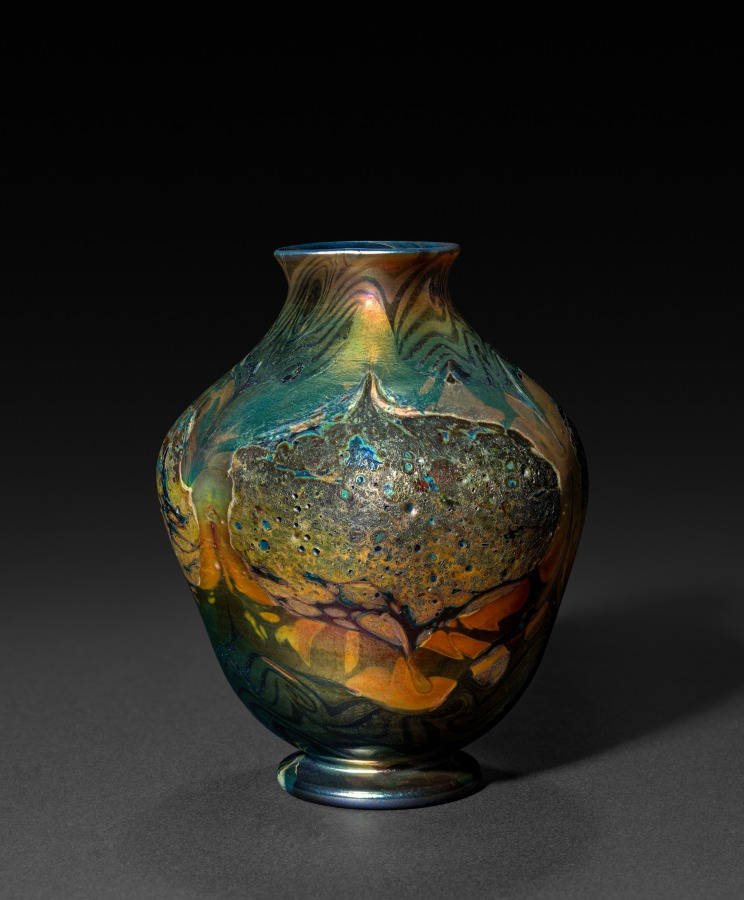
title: Cypriot Vase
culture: America, New York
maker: Tiffany Glass & Decorating Company (America, New York, 1892–1902)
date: c. 1895–1900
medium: Favrile glass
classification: Glass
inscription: engraved on underside: L.C.T. 5339 #206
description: This small vase is an example of Louis Comfort Tiffany's signature Favrile glass. It was made in the style of ancient glass from Cyprus that Tiffany had admired for the iridescent color and encrusted texture of the surface caused by oxidation while buried for many years. Tiffany had noticed these qualities in ancient glass exhibited at the Metropolitan Museum of Art and at his father's store, Tiffany & Co., in New York. When Tiffany began collaborating with artisans on new types of glass production in the 1880s, his aesthetic ambitions were realized in the development of Favrile glass, deliberately named to sound French, expensive, and “handmade.” Largely through Tiffany's marketing ability, Favrile glass became America’s greatest contribution to the Art Nouveau style. His works were exhibited at international expositions; galleries in major European cities, where his creations were bought by many museums; and in his store in Manhattan, known as the Tiffany Glass and Decorating Co., later Tiffany Studios. From the outset, Tiffany used Favrile glass in mosaic panels, stained glass windows, and his artistic line of table and floor lamps.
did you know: Louis Comfort Tiffany took inspiration from the ancient glass artifacts found in the collection of the Metropolitan Museum of Art in New York.